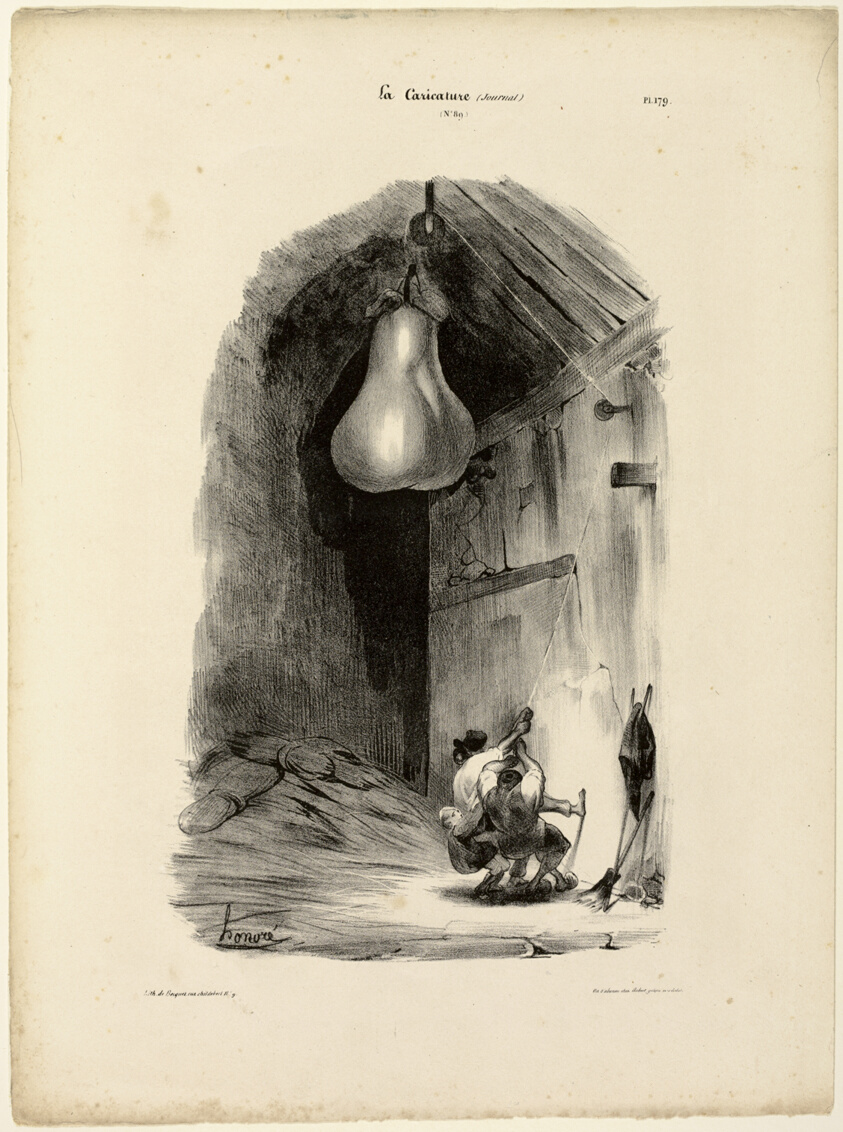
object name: Print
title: “Heave-ho!..Heave-ho! Heave-ho!,” plate 179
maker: Honoré Victorin Daumier; French, 1808-1879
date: 1832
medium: Lithograph in black on white wove paper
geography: France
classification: lithograph; print; prints and drawing